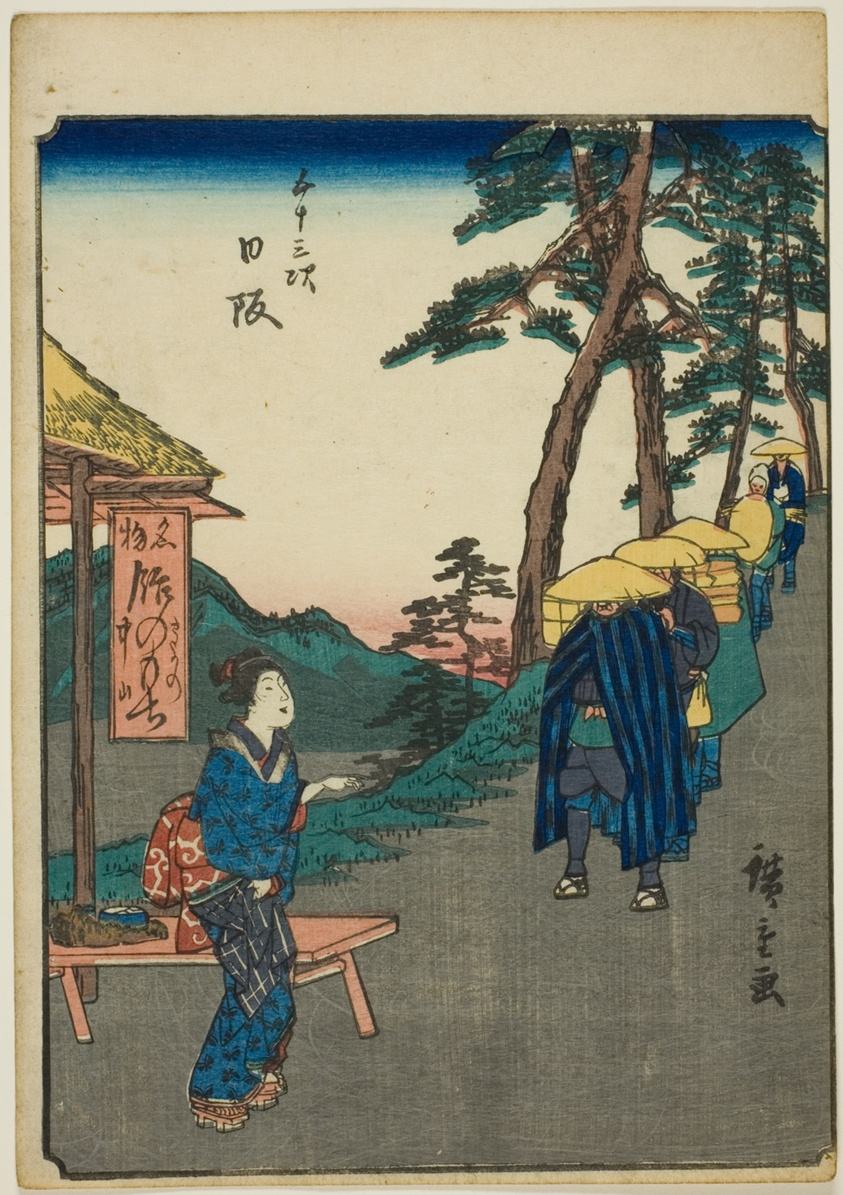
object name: Print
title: Nissaka, from the series "Fifty-three Stations [of the Tokaido] (Gojusan tsugi)," also known as the Figure Tokaido (Jinbutsu Tokaido)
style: Japanese (culture or style)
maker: Utagawa Hiroshige 歌川 広重; Japanese, 1797-1858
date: 1852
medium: Color woodblock print; chuban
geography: Japan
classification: woodblock print; print